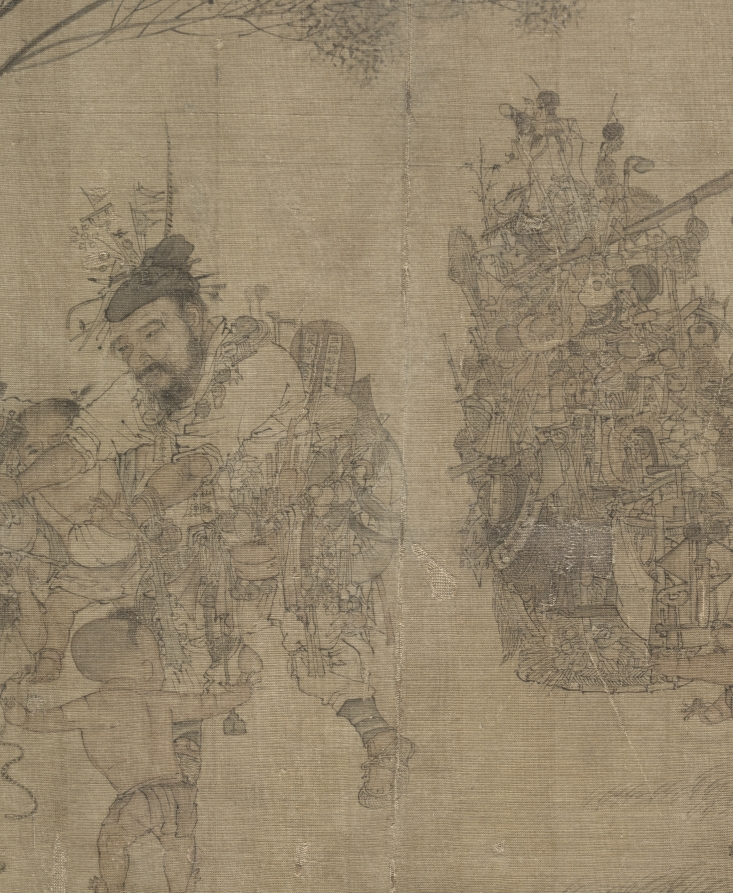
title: The Knickknack Peddler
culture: China, Southern Song dynasty (1127-1279)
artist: Li Song (Chinese, active c. 1190–c. 1230)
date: 1212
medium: Album leaf; ink and color on silk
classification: Painting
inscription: Artist's inscription: 嘉定壬申李嵩畫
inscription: 1 colophon and 4 seals: 1 colophon and 3 seals of Li Zuoxian 李佐賢 [1807–1876]; 1 seal unidentified.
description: The court artist Li Song from Hangzhou excelled in meticulous depictions of children, peddlers, and their various goods. Here, he captures a dramatic scene of children attacking a snake with a stick and stone. The peddler rushes toward the children, leaving his merchandise unattended. Painted during the reign of emperor Ningzong, the drama unfolding around vulnerable children may allude to Ningzong’s nine sons who died young, leaving him without a direct male descendant.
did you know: There is a skull, upside down, near the top of the left basket.